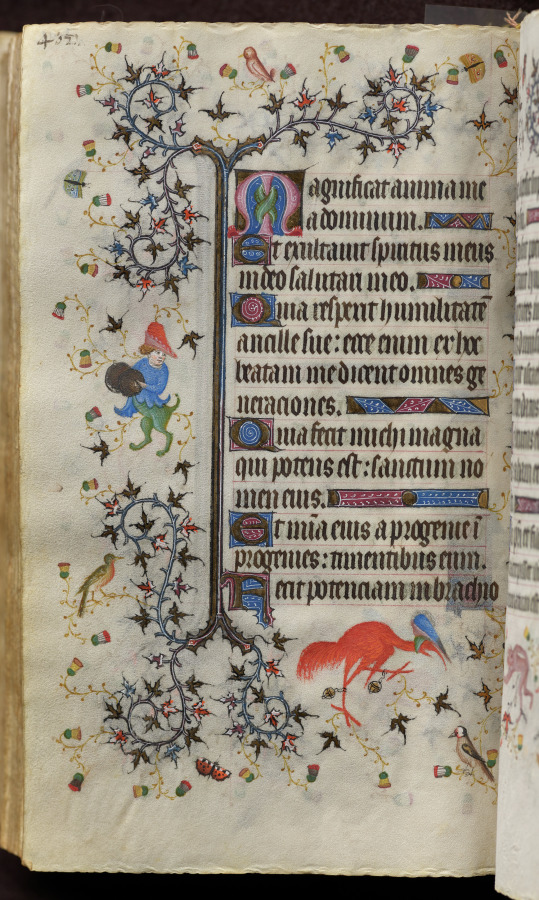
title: Hours of Charles the Noble, King of Navarre (1361-1425): fol. 195v, Text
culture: France, Paris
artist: Master of the Brussels Initials and Associates (French)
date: c. 1405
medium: ink, tempera, and gold on vellum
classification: Bound Volume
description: This precious volume was obviously highly prized by its owner, the French-born King of Navarre, who had his coat of arms painted on no less than twenty folios. Rather than directly commissioning this manuscript from a specific workshop, it seems that Charles the Noble acquired his book of hours -- perhaps ready-made for the luxury market -- while on a trip to Paris in 1404-05. A collaborative effort, six painting styles are evidenced within the pages of this codex, those of two Italians, two Frenchmen, and two Netherlanders. The painter who was responsible for the planning and decoration of the book, and who produced seventeen of the large miniatures, was a Bolognese artist known as the Master of the Brussels Initials. His principal assistant, responsible for most of the borders, was a Florentine who signed his name "Zecho" da Firenze on folio 208 verso.